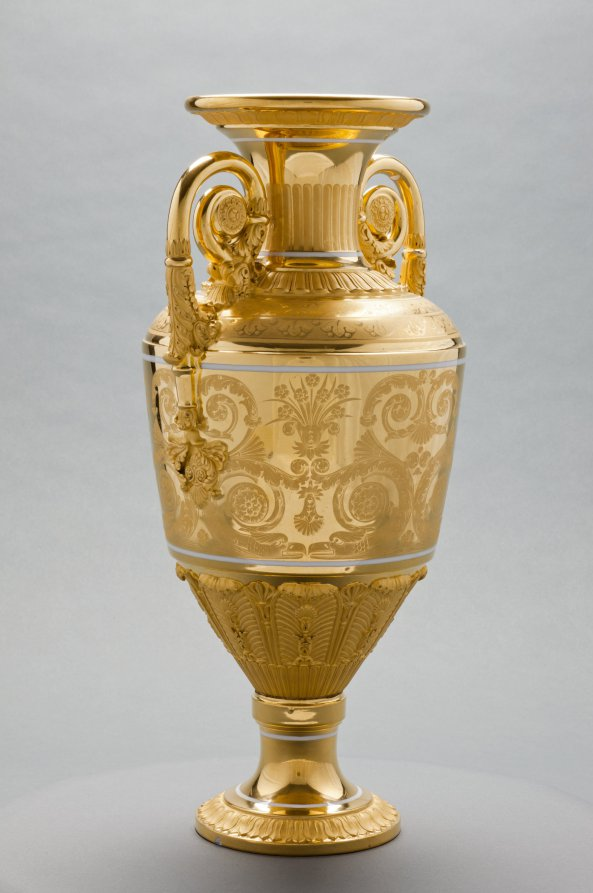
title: Vase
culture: Russia, St. Petersburg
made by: St. Petersburg Imperial Porcelain Factory (Russian)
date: c. 1820–1830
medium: gilt porcelain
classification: Ceramic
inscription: inscribed: "Moreau" in gold near lip.